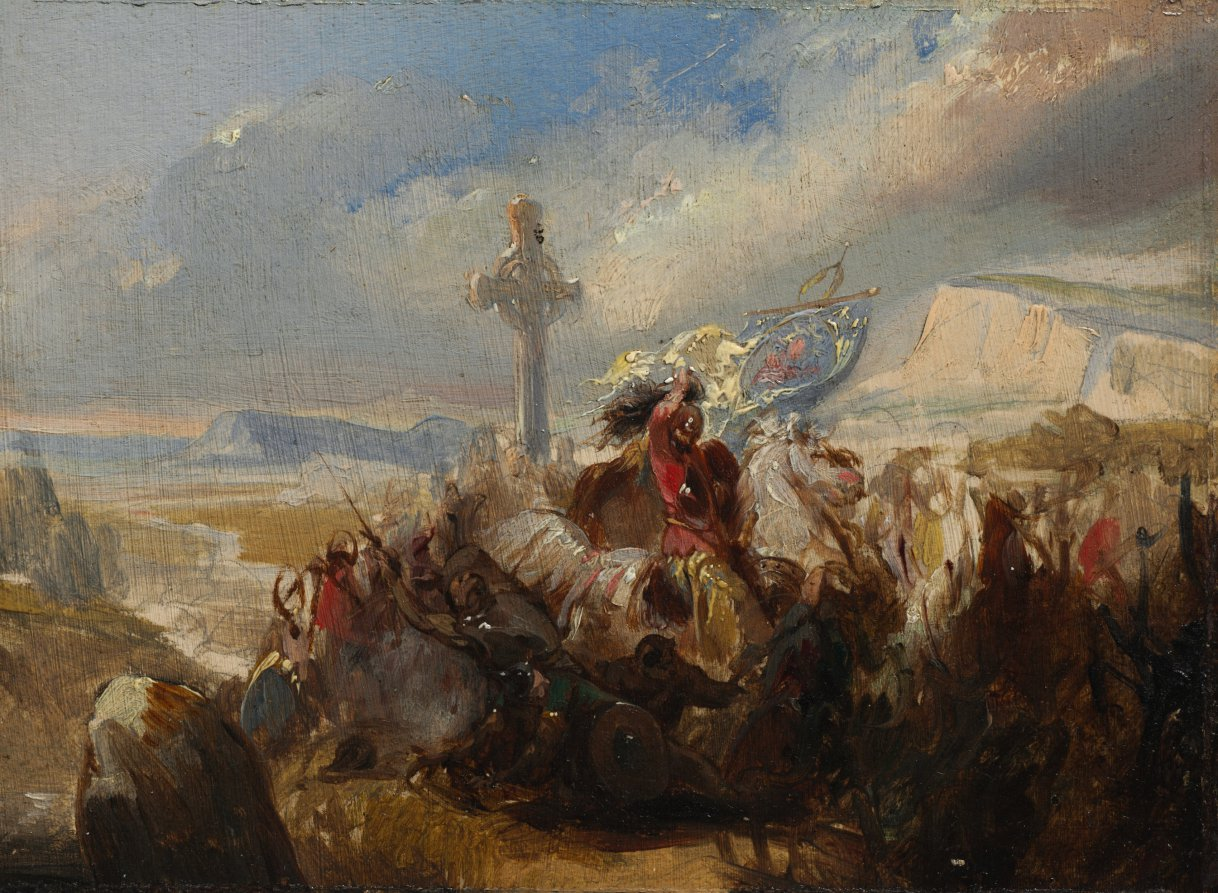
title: Battle of Poitiers, 25 October 732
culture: France, 19th century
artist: circle of Baron Charles de Steuben (French)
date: 1830s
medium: oil on pulp board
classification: Painting